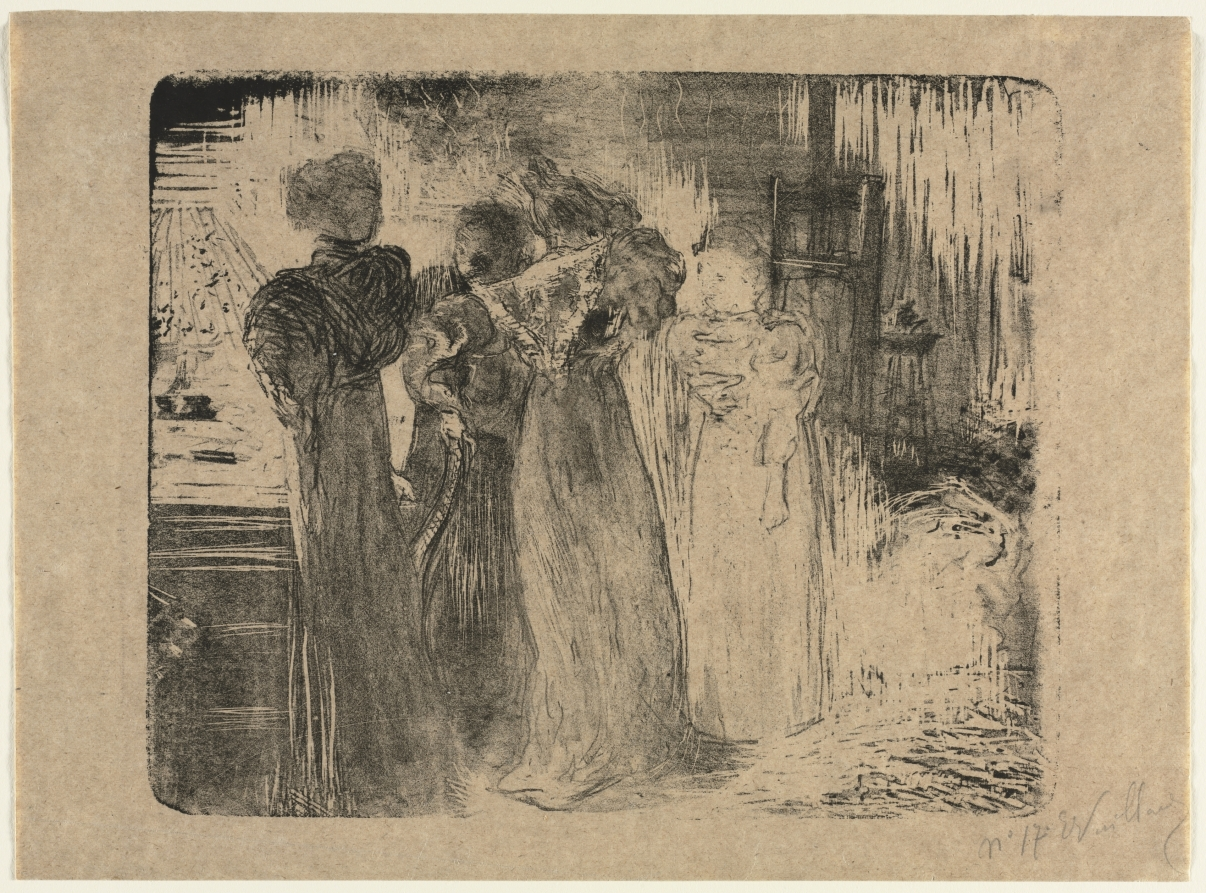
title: The Studio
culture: France, 19th-20th century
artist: Édouard Vuillard (French, 1868–1940)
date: c. 1895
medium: lithograph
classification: Print